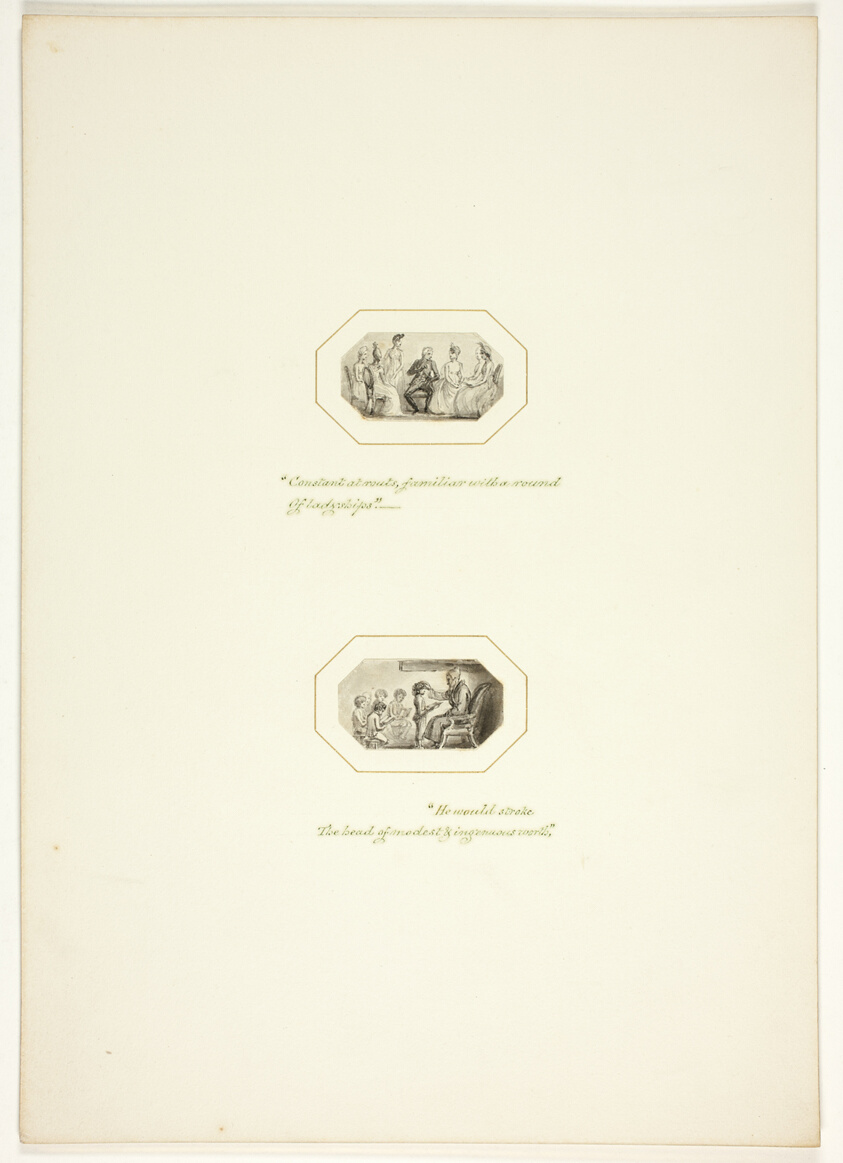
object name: Drawing and Watercolor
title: Study for a plate from The Task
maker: Thomas Stothard (English, 1755-1834)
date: c. 1800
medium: Ink wash on paper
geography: England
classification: ink or chalk wash; drawings (visual works); prints and drawing